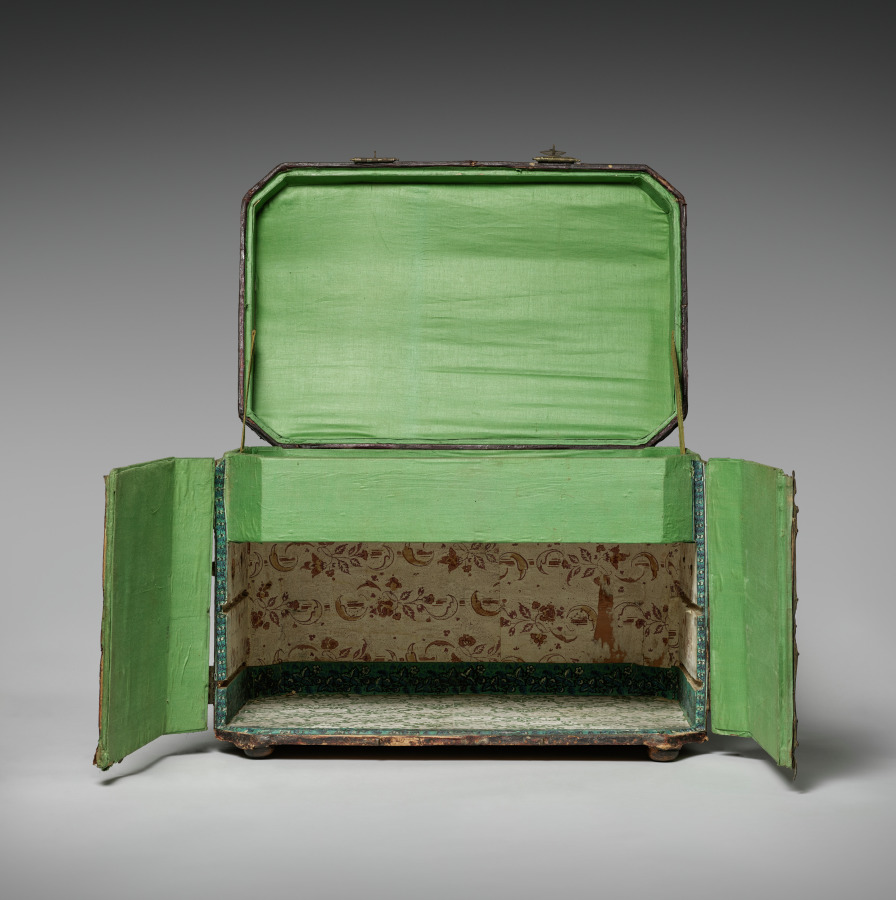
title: Chest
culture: Italy, Venice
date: 1700s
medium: leather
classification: Miscellaneous